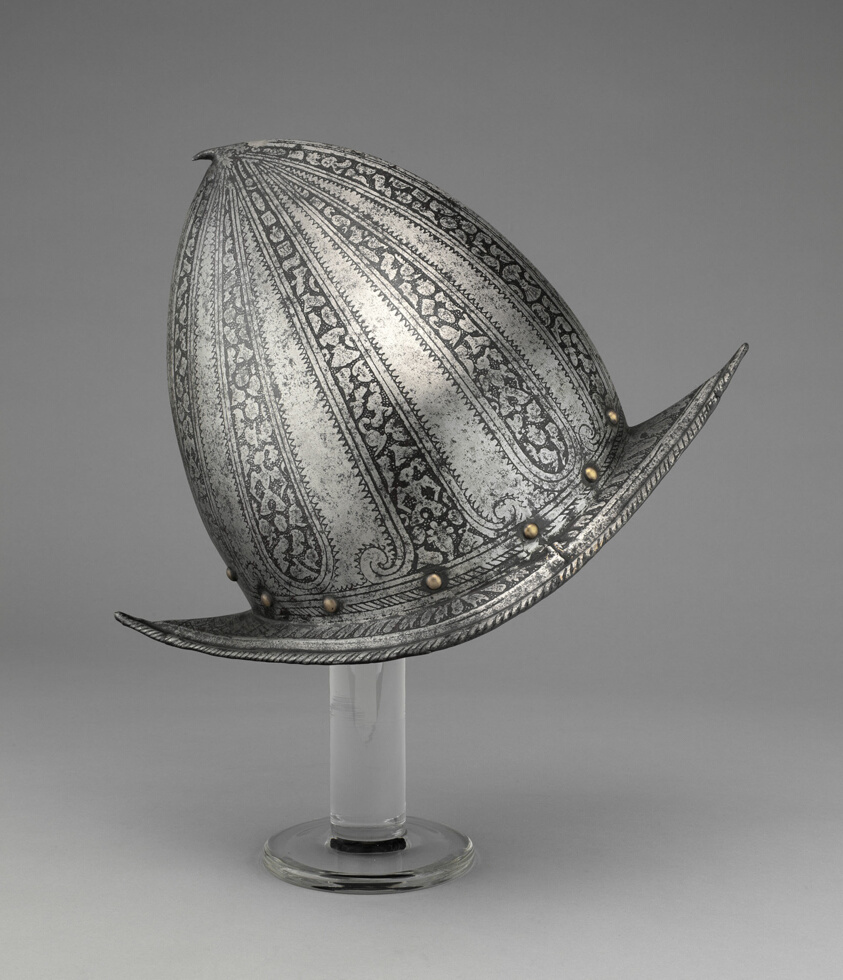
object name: Armor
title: Pointed Morion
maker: North Italian, probably Milan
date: c. 1580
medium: Steel and brass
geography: Milan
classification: suit-helmet; armor; arms and armor